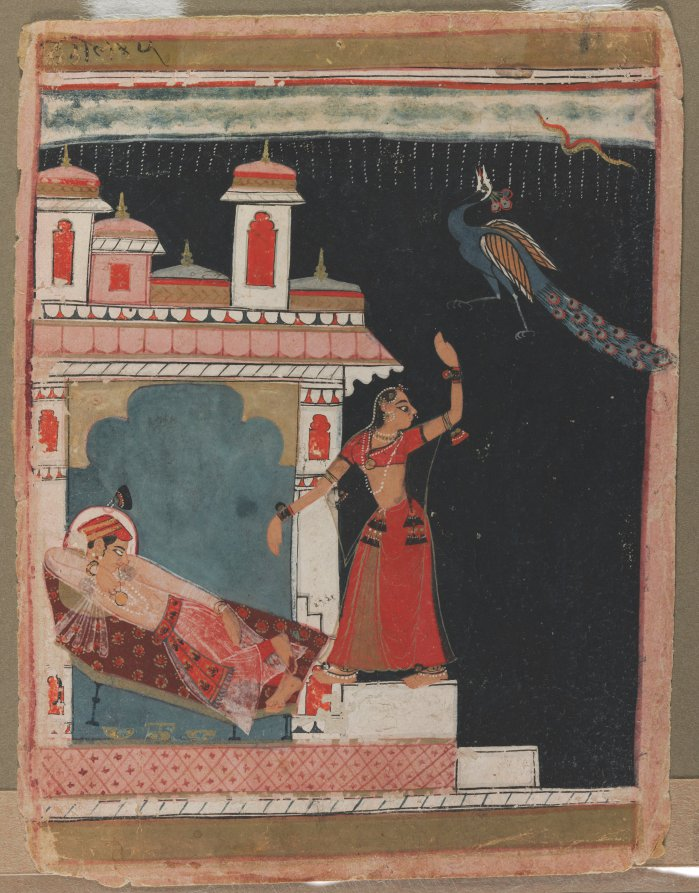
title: Madhu Madhavi Ragini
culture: Central India, Malwa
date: c. 1630–40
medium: Gum tempera, ink, and gold on paper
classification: Painting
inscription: Inscription in Hindi on reverse: Madhu Madhavi, the ragini of Hindol: a heroine who has come to her lord. The eye sees less than all and is at variance with thought (paraphrased from Coomaraswamy, 1916); title repeated in Persian.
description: One of the first paintings to be published and exhibited as an example of native Indian court painting without foreign stylistic influence, this work emphasizes the expression of mood and emotion rather than pictorial narrative. Through bold contrasting color, suggestive gaze, and poetic trope, the viewer accesses the charged excitement of lovers about to be united with the coming of the monsoon at night. The reclining hero admires the alluring form of his beloved who, startled by the lightning and the cry of the peacock, stops and twists around in a dramatic pause that sets off her figure to especially good effect. She raises one hand to feel the first drops of monsoon rain that signal the beginning of the season of lovemaking, when her lover remains at home.